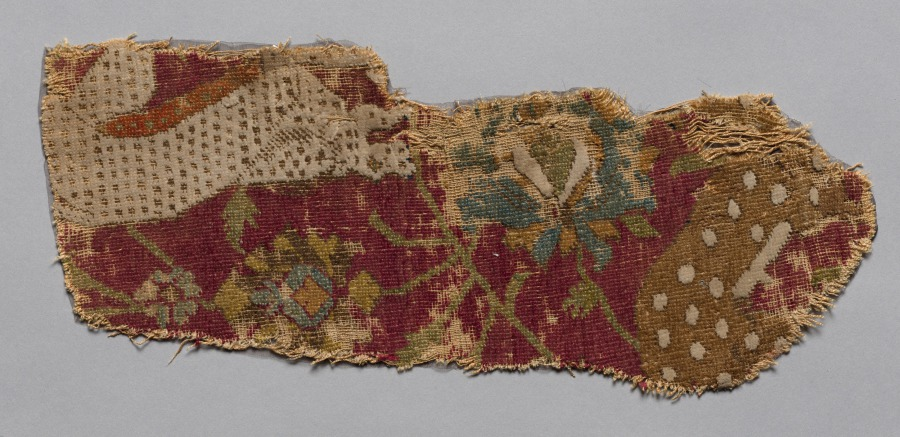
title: Fragment of a Carpet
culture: India ? Iran ? Herat ?, 16th century (?)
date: 16th century (?)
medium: silk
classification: Carpet